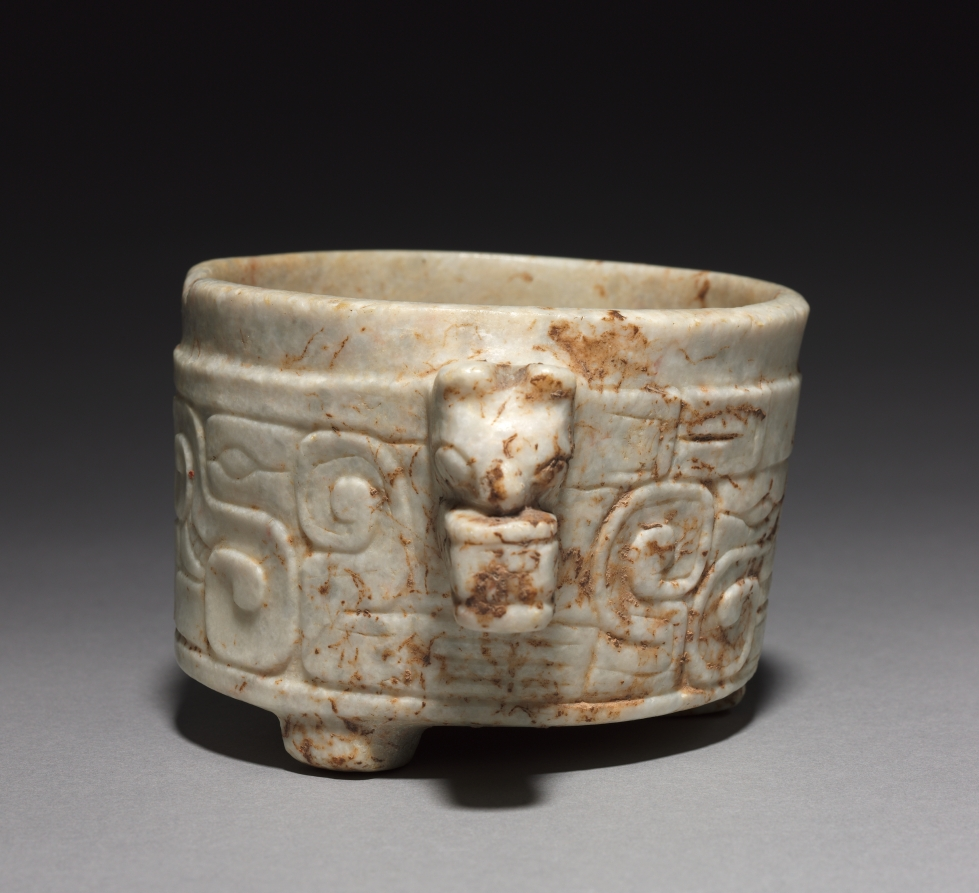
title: Tripod Bowl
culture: Honduras, Ulúa Valley, 7th-10th century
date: 600–1000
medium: marble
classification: Sculpture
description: Between about 600 and 800, white marble vessels carved in dense relief on their outer surfaces were a form of luxury and wealth in the Ulúa region of Honduras. Two confronting profile zoomorphic heads occur on each side of this example, between three-dimensional handles shaped as bat heads. Originally the vessel may have been covered with stucco and brightly painted.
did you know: One of two vessels that were the first ancient American artworks collected by James and Florence Gruener.